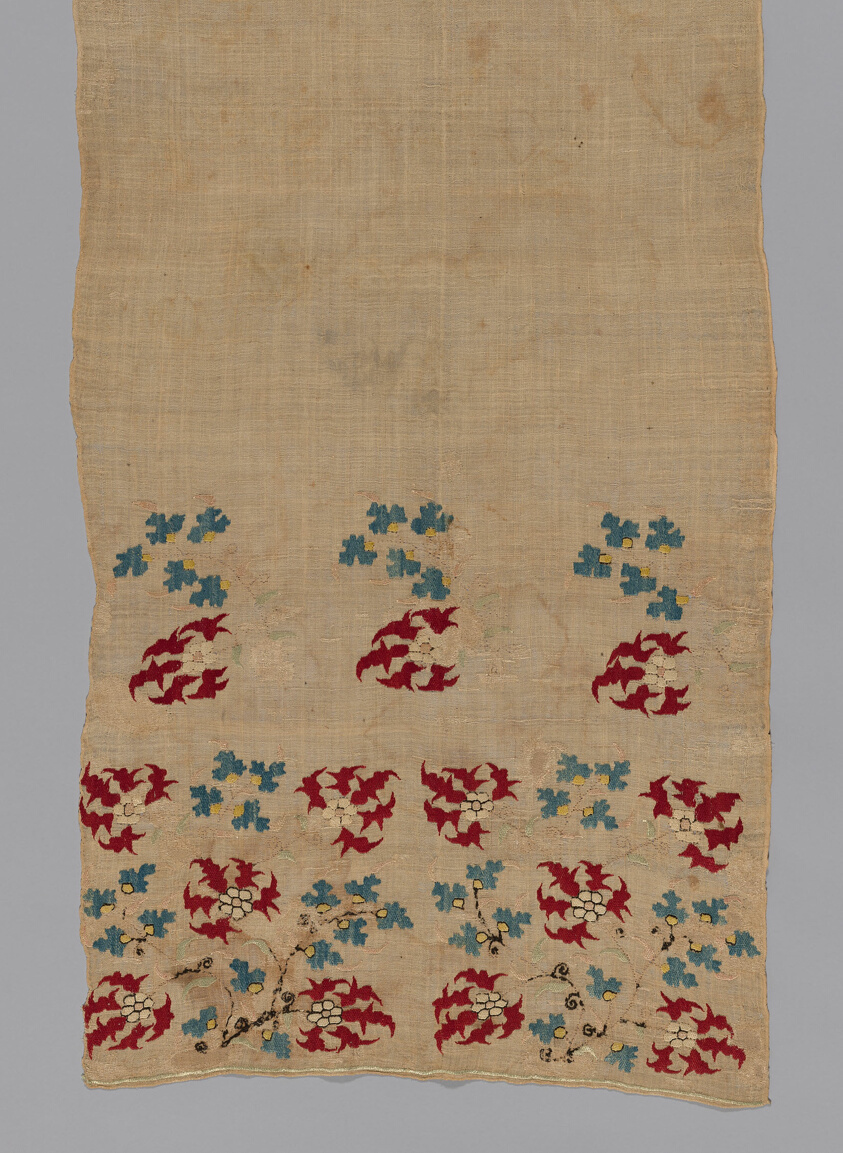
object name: Textile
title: Towel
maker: Greece, probably Epirus Province or Ionian Islands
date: 1700/1900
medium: Linen, plain weave; embroidered with silk in double running and twined double running stitches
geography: Greece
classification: textile; needlework (visual works)